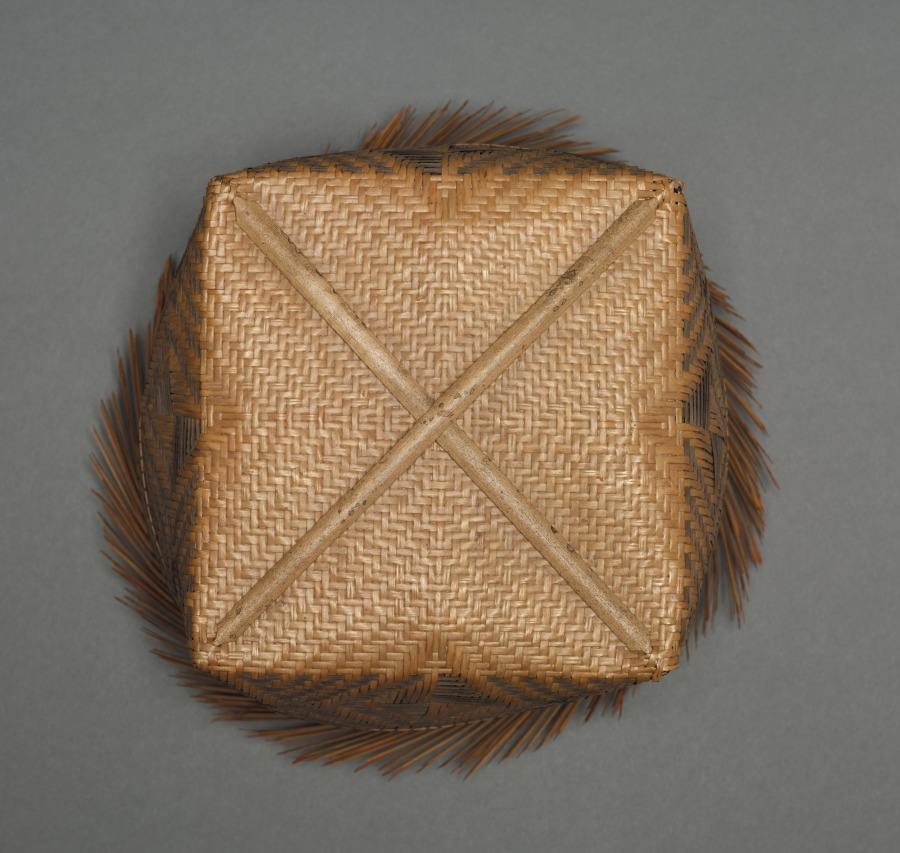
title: Hat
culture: Africa, Central Africa, Democratic Republic of the Congo, Mangbetu-style maker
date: by 1928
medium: Plant fibers and dye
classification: Garment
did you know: This woven hat looks brand new because it was one of the many items the business-savvy chief of Ekibondo had artists and artisans make for the foreigners who passed through his village.